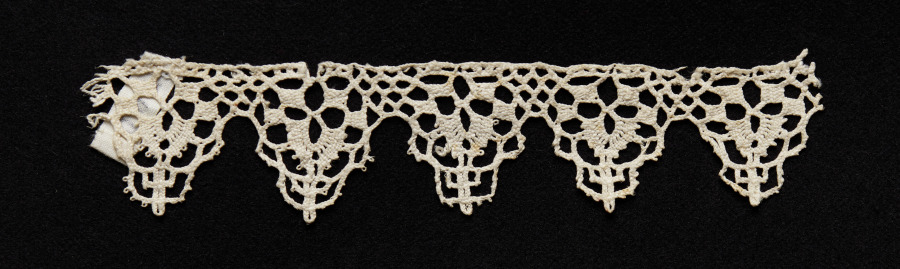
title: Lace Edging of Points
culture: Italy, Genoa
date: 1550s-1590s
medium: Bobbin lace (needle lace (reticella) design)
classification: Lace